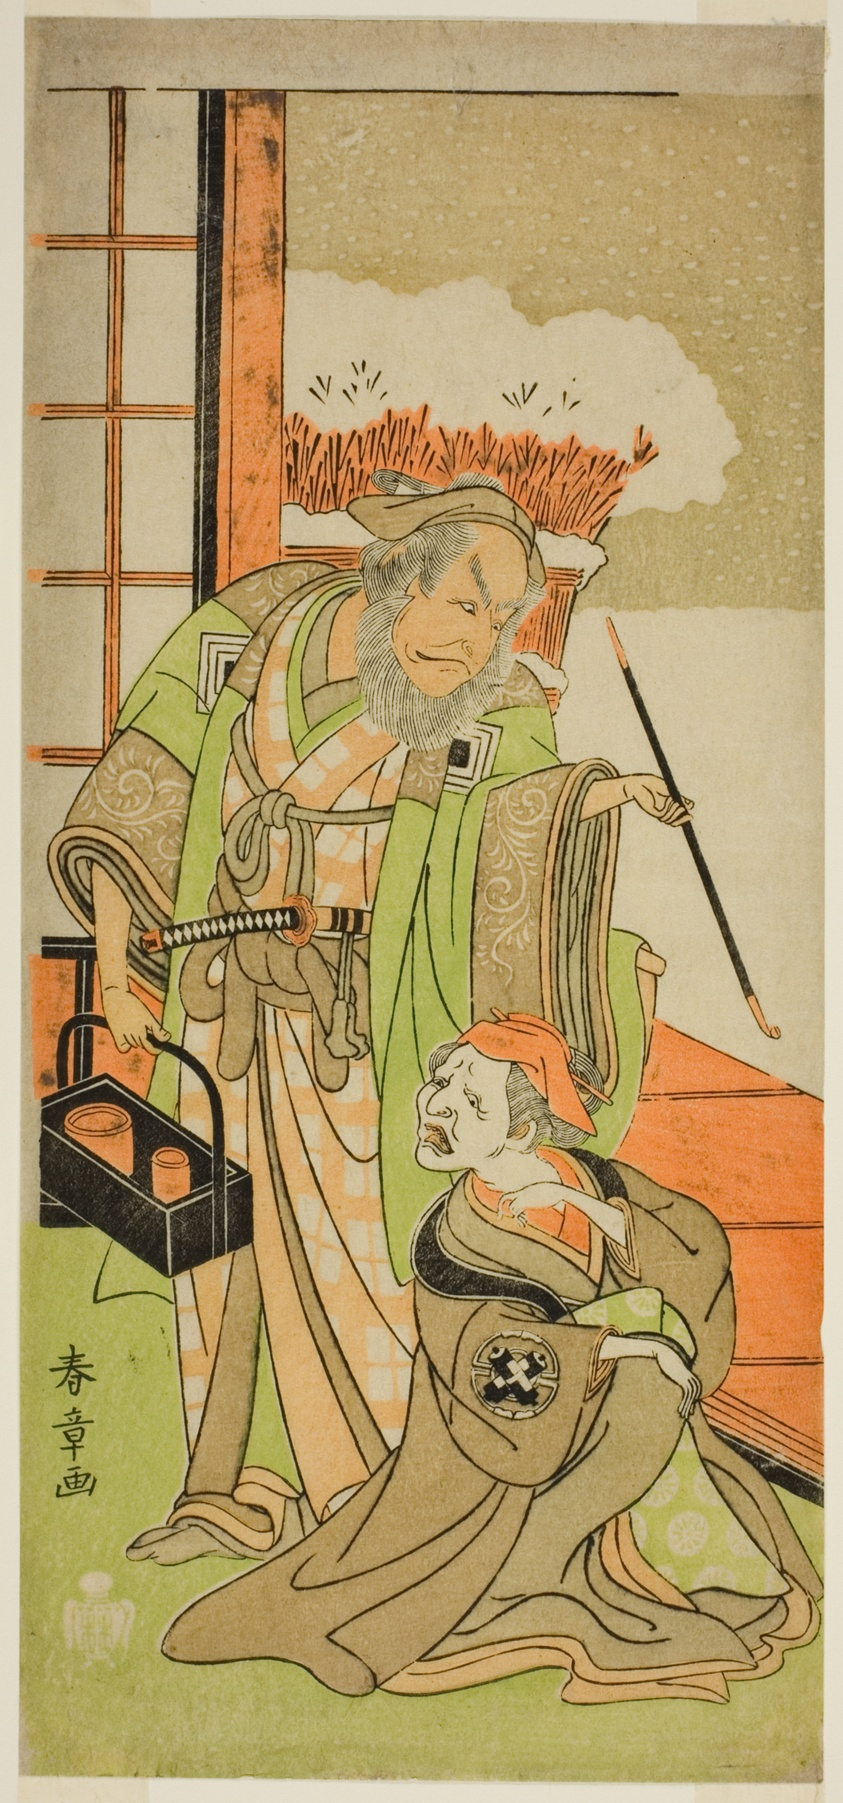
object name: Print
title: The Actors Nakamura Utaemon I as Karashi Baba (right), and Ichikawa Danjuro IV as Sanshodayu (left), in the Play Kawaranu Hanasakae Hachi no Ki, Performed at the Nakamura Theater in the Eleventh Month, 1769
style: Japanese (culture or style)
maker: Katsukawa Shunsho 勝川 春章; Japanese, 1726-1792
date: c. 1769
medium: Color woodblock print; hosoban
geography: Japan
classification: woodblock print; print; asian art